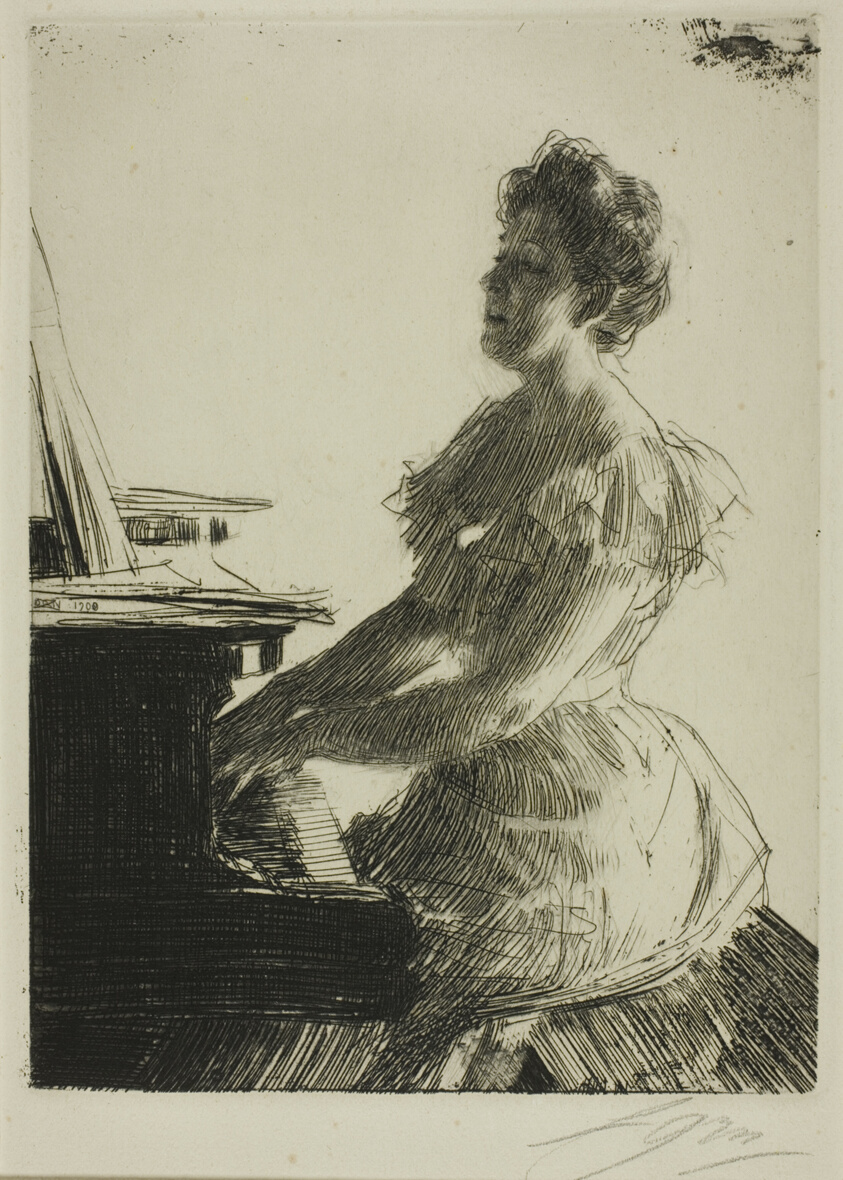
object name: Print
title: At the Piano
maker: Anders Zorn (Swedish, 1860-1920)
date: 1900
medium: Etching on ivory laid paper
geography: Sweden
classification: etching; print; prints and drawing